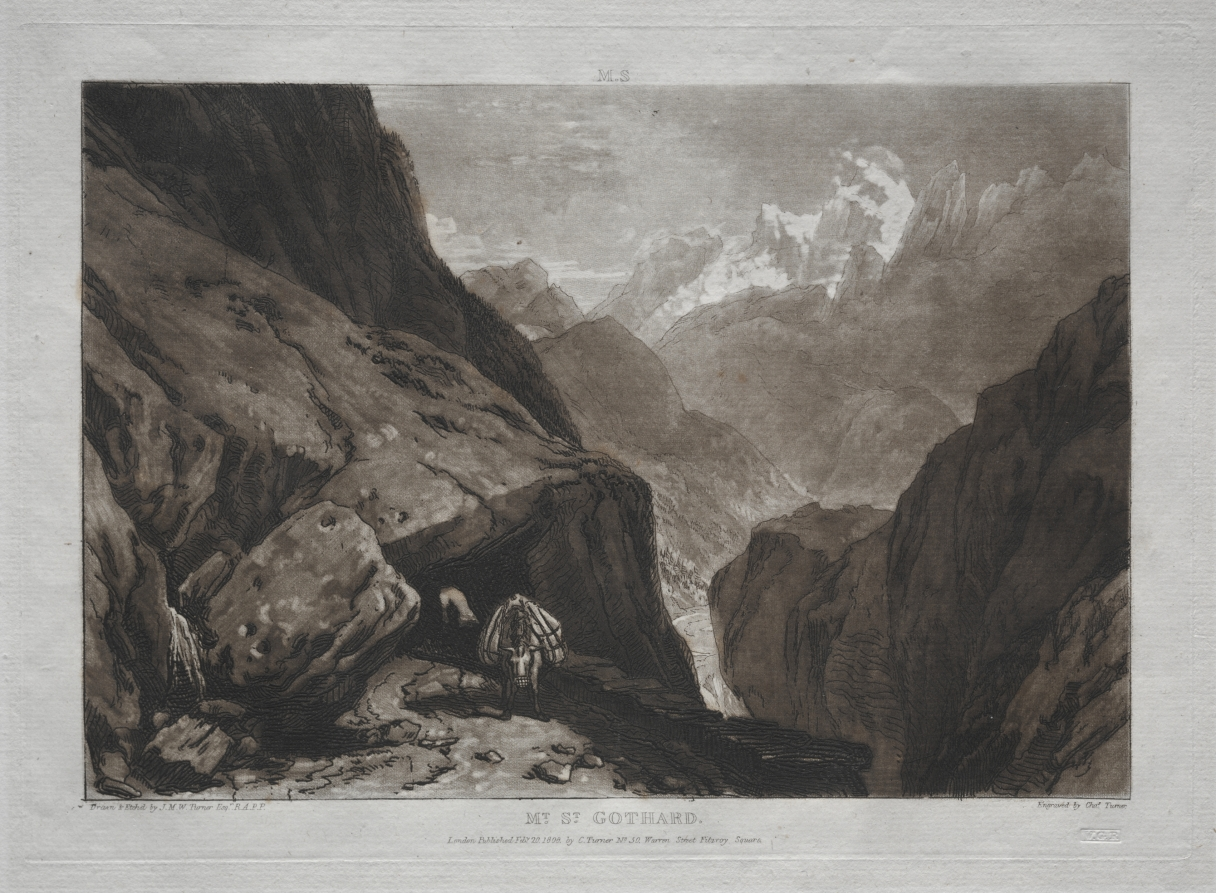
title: Liber Studiorum: Mt. St. Gothard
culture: England, 19th century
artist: Joseph Mallord William Turner (British, 1775–1851)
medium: etching and mezzotint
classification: Print